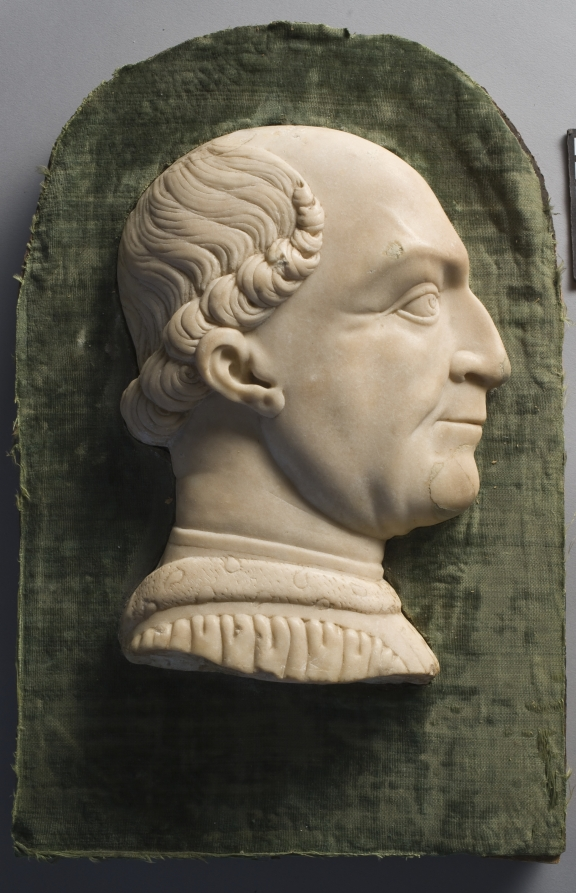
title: Portrait of Francesco Sforza and Frame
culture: Italy, Lombardy, 15th century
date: 1450–1499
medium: marble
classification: Sculpture